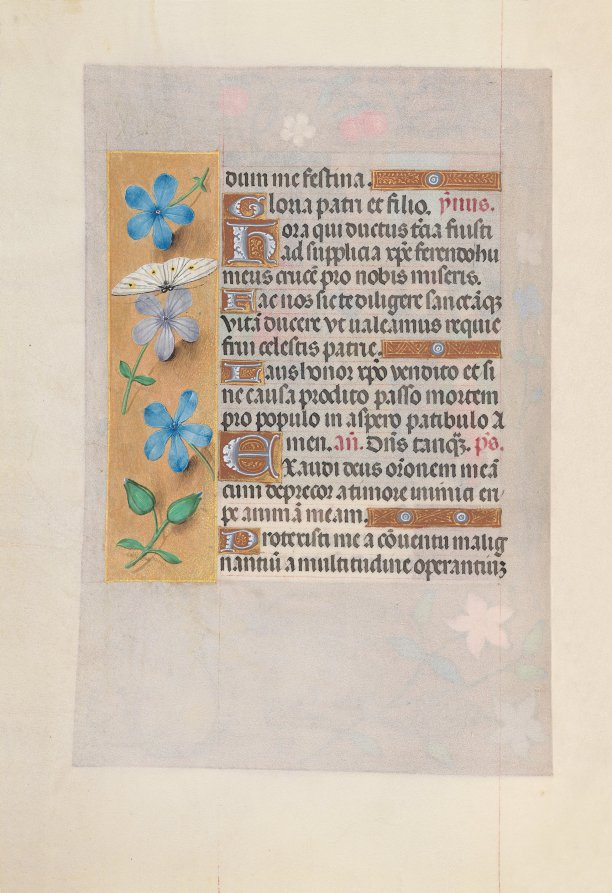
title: Hours of Queen Isabella the Catholic, Queen of Spain: Fol. 63v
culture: Flanders, Ghent and Bruges, late 15th century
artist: Master of the First Prayerbook of Maximillian (Flemish, c. 1444–1519)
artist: and Associates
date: c. 1500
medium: ink, tempera, and gold on vellum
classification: Bound Volume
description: This manuscript was illuminated by a circle of at least five highly organized manuscript painters active in the Flemish cities of Ghent and Bruges. The principal illuminator was Alexander Bening, who painted the majority of the book's miniatures. Manuscripts produced by this circle of artists are renowned for the decoration of their borders, which typically feature a rich variety of realistically-painted flowers, birds, and butterflies. This prayer book, called a book of hours, was intended not for a cleric, but for the private devotions of a lay person-in this case, Isabella the Catholic, Queen of Spain (1451-1504). Isabella's coat of arms embellishes the book's frontispiece. It is unlikely that the book was commissioned by the Queen herself; rather, she probably received it as a diplomatic gift from someone courting her patronage, perhaps Cardinal Francisco Jimenez de Cisneros. A Franciscan friar, Jimenez was dependent upon Isabella for his advancement, first to the post of Queen's confessor in 1492, and then to Archbishop of Toledo in 1495.